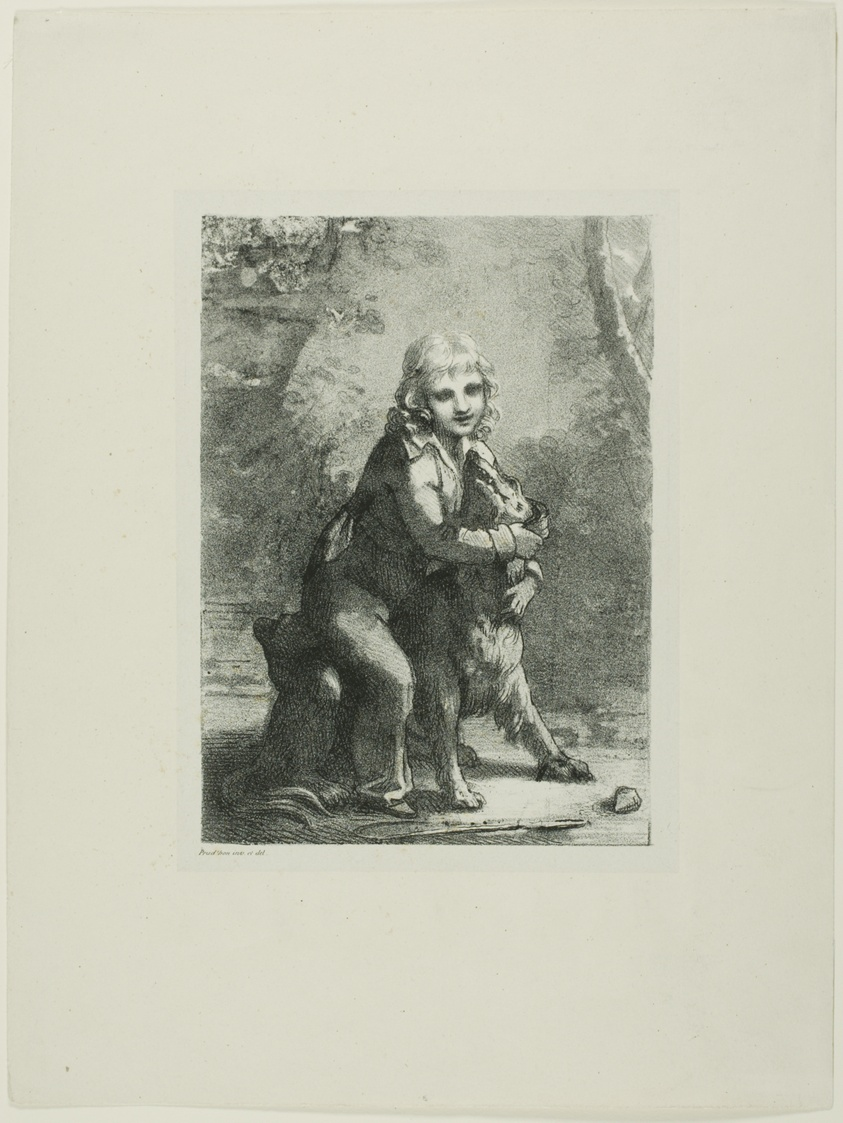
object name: Print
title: Boy with a Dog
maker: Pierre-Paul Prud'hon; French, 1758-1823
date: c. 1822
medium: Lithograph on ivory chine, laid down on cream wove paper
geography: France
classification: lithograph; print; prints and drawing